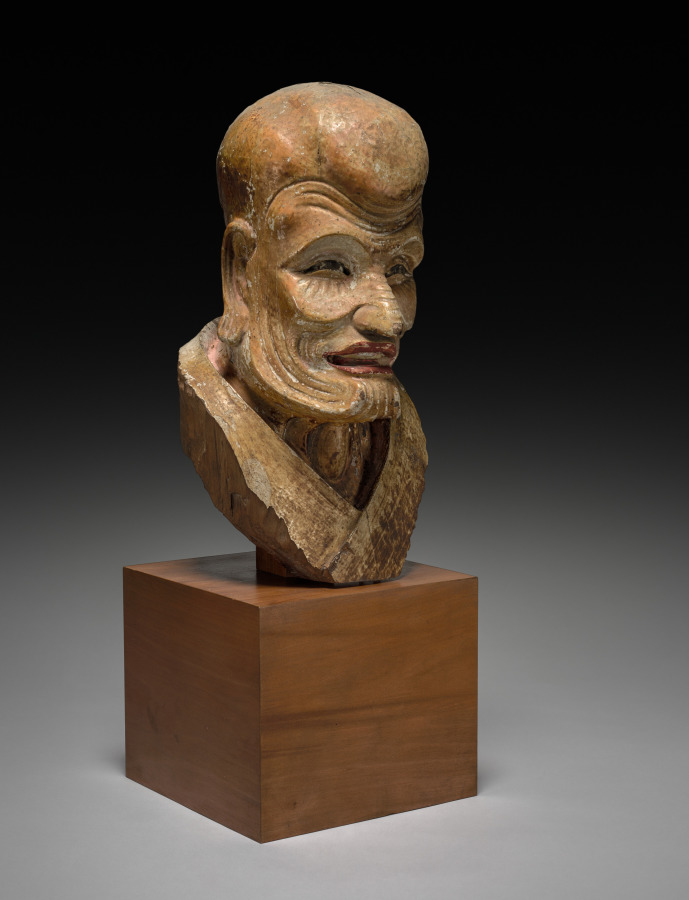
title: Head of a Patriarch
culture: China, Ming dynasty (1368-1644) or earlier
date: 1368–1644 or earlier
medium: wood covered with lacquer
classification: Sculpture